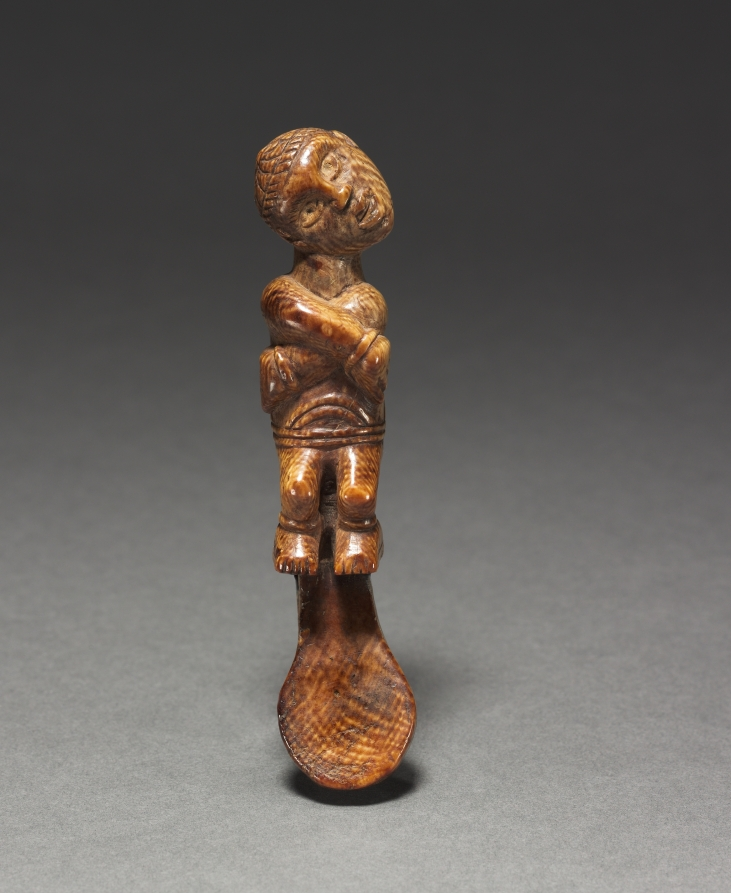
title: Female Figurine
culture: Africa, Central Africa, Democratic Republic of Congo (most likely), Cabinda, or Republic of the Congo, probably Yombe-style maker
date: late 1800s–early 1900s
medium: Ivory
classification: Sculpture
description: This female figurine may be a fragment of a spoon or spatula, but is not confirmed. Iconography of the human image is common in the art of Kongo-speaking peoples, however, this object’s function or purpose is unknown. The position of the arms has been interpreted as that of a bound prisoner while the positioning of the head represents a broken neck or severed head, thus identifying as a sacrificial victim.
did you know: This object is believed to be a portion of a spoon or a spatula. The position of the prisoner is believed to be a sacrificial victim.